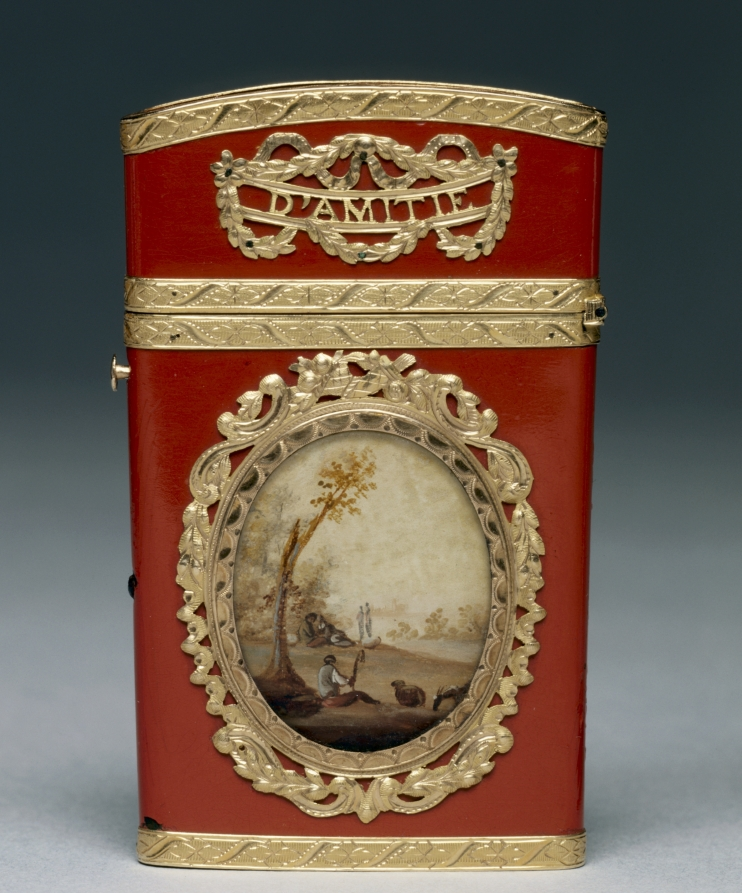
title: Carnet de Bal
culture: France, 18th Century (style of Louis XVI)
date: 1774–1775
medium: enamel on steel (?), gold mounts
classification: Miscellaneous